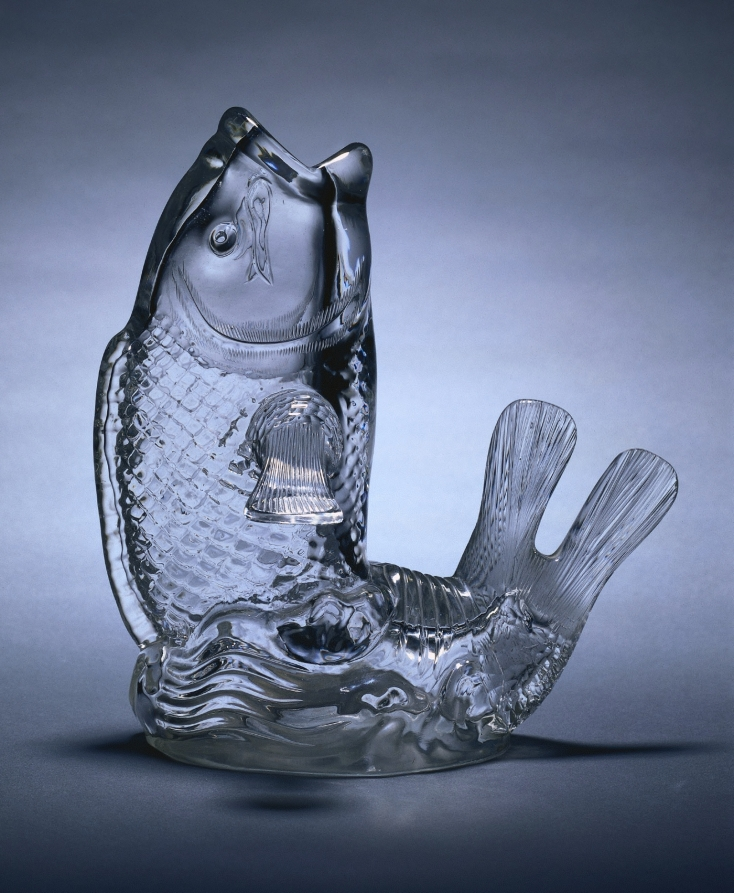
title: Fish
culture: France, 19th century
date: c. 1880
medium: glass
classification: Glass